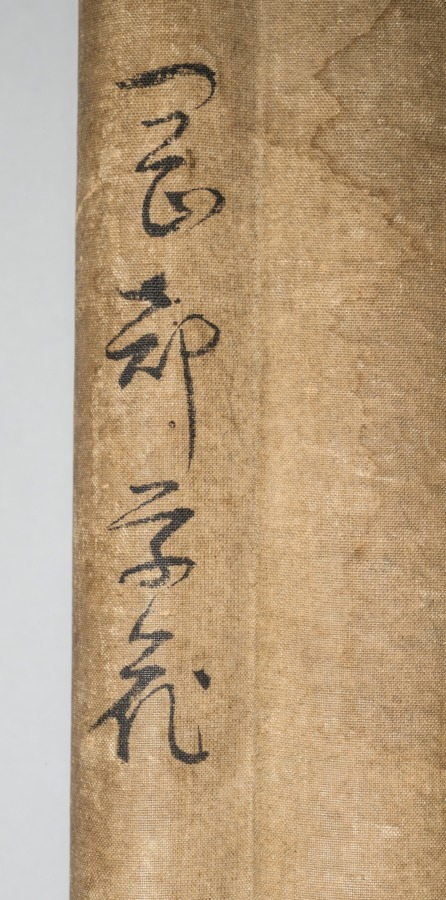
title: Vase of Flowers with Grasshopper, Marine Life, and Garden Rock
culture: Japan, Meiji period (1868–1912)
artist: Okabe Ko (Japanese)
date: late 1800s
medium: hanging scroll; ink and color on silk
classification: Painting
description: A great interest in Western scientific studies developed in Japan during the late Edo period (1615-1868) and into the Meiji era (1868-1912). One outcome of this phenomenon in the visual arts was the detailed portrayal of plant, animal, and marine life. This painting is an assemblage of objects carefully observed from nature, but not usually seen together.